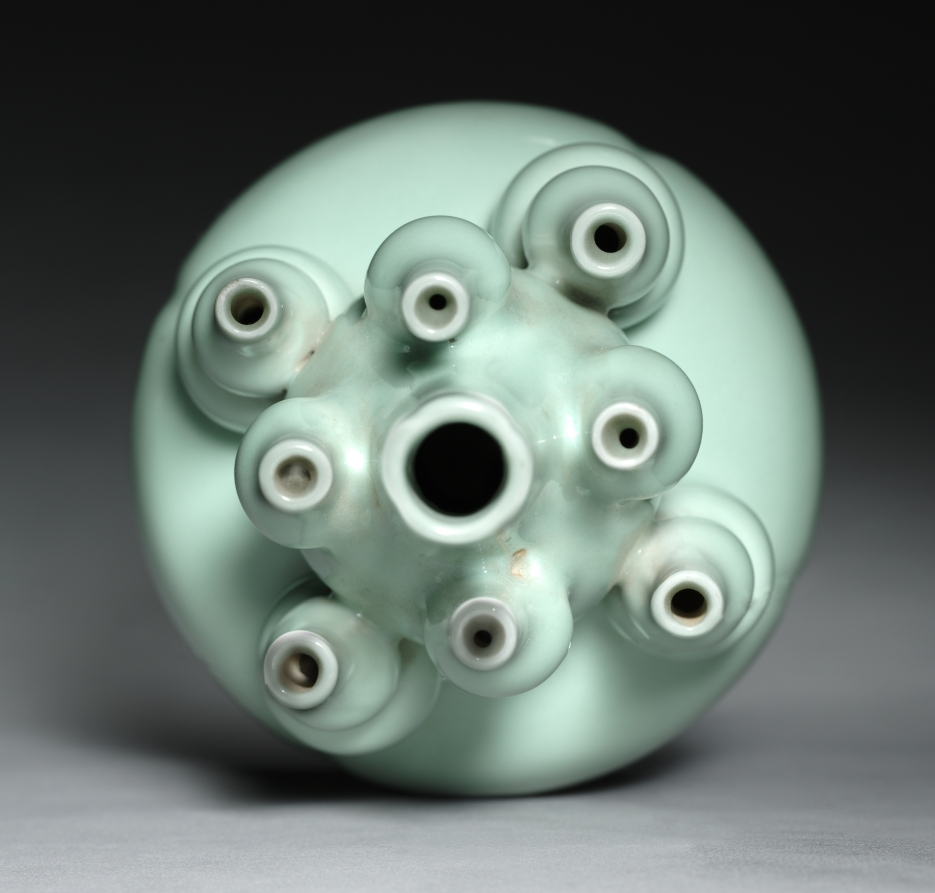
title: Double-gourd Shaped Bottle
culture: China, Qing dynasty (1644–1911), Qianlong mark and reign (1736–95)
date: 1736–95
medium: porcelain with celadon glaze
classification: Ceramic